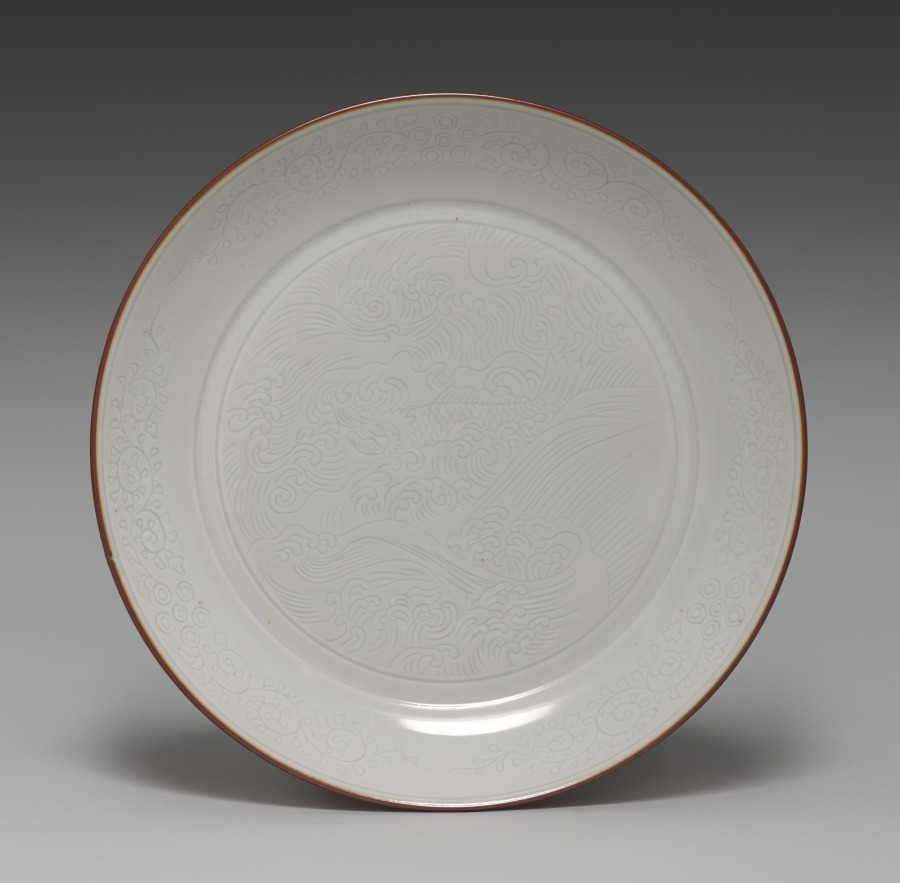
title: Dish with Carp in Waves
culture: Japan, Meiji period (1868–1912)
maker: Seifū Yohei III (Japanese, 1851–1914)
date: 1893–1914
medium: Porcelain with incised designs, iron oxide, and red glaze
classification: Ceramic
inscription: 清風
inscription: 清風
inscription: 清風盧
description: The exterior of this low, wide dish with flared foot is covered with a red coral glaze. Its interior is white with incised designs, and the rim is decorated with brown iron oxide. The primary design occupies the flat bottom of the bowl and is bound within a single band. It is of a carp swimming vigorously against roiling waves with frothy crests moving in multiple directions; the water just above the fish’s head is beginning to form a whirlpool. A closer look at the fish’s face reveals that it somewhat resembles that of a dragon. It is possible that the motif is meant to be a carp who jumps over the waterfall and transforms into a dragon, who flies into the sky. The iconography symbolizes the transformative experience of striving to one’s utmost and achieving the impossible against tough odds. Originating in China, the narrative’s visual representation as well as its meaning crossed the ocean to Japan, where it often appeared on items gifted to those celebrating pivotal successes in life, such as obtaining elevated status in one’s work or graduating from an academic program.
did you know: The inside walls of the bowl are decorated with three abstract flowers, each represented with five circles ringing a central circle, from which leafy tendrils stretch in both directions .